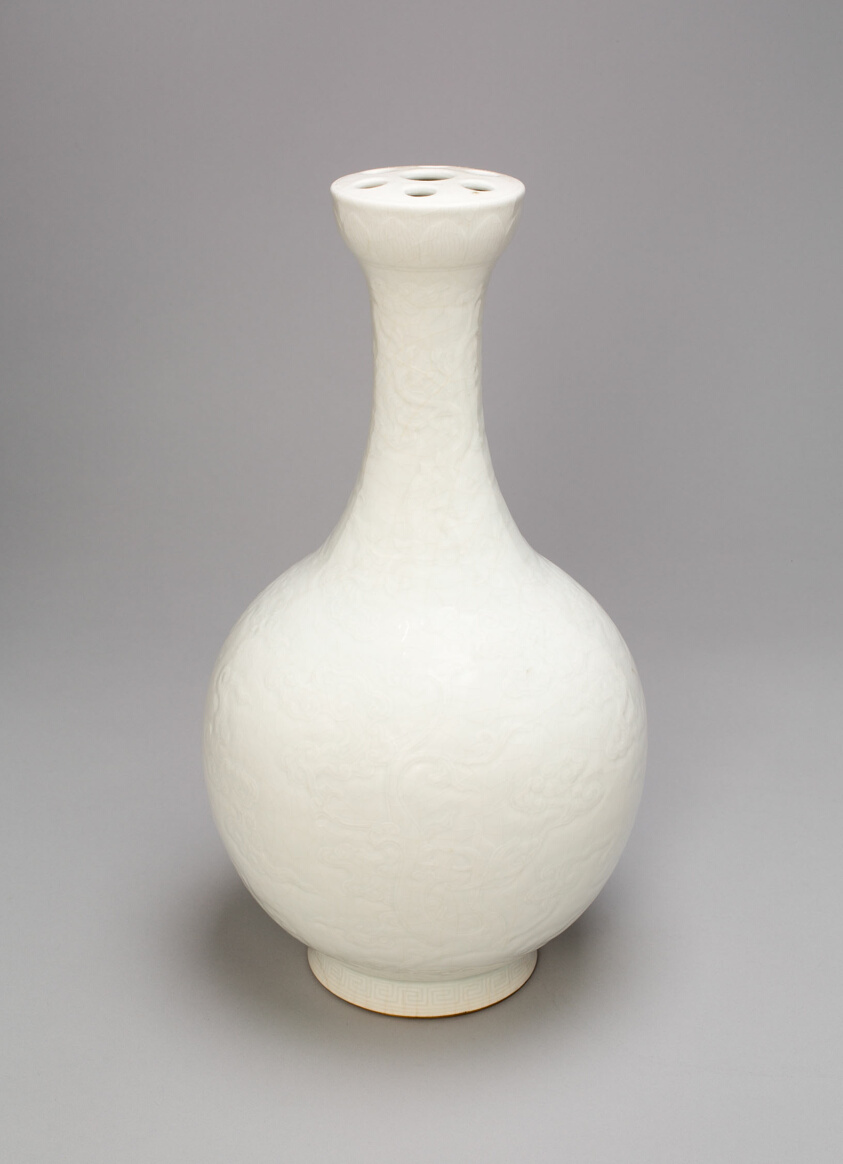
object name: Vessel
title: Bottle-Shaped Vase for Incense Sticks or Flowers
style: Chinese (culture or style)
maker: China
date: Ming dynasty (1368–1644) or Qing dynasty (1644–1911), c. late 17th/18th century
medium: Dehua ware (blanc de chine); porcelain with underglaze molded decoration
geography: China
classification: vase; porcelain; vessel; asian art; ceramics